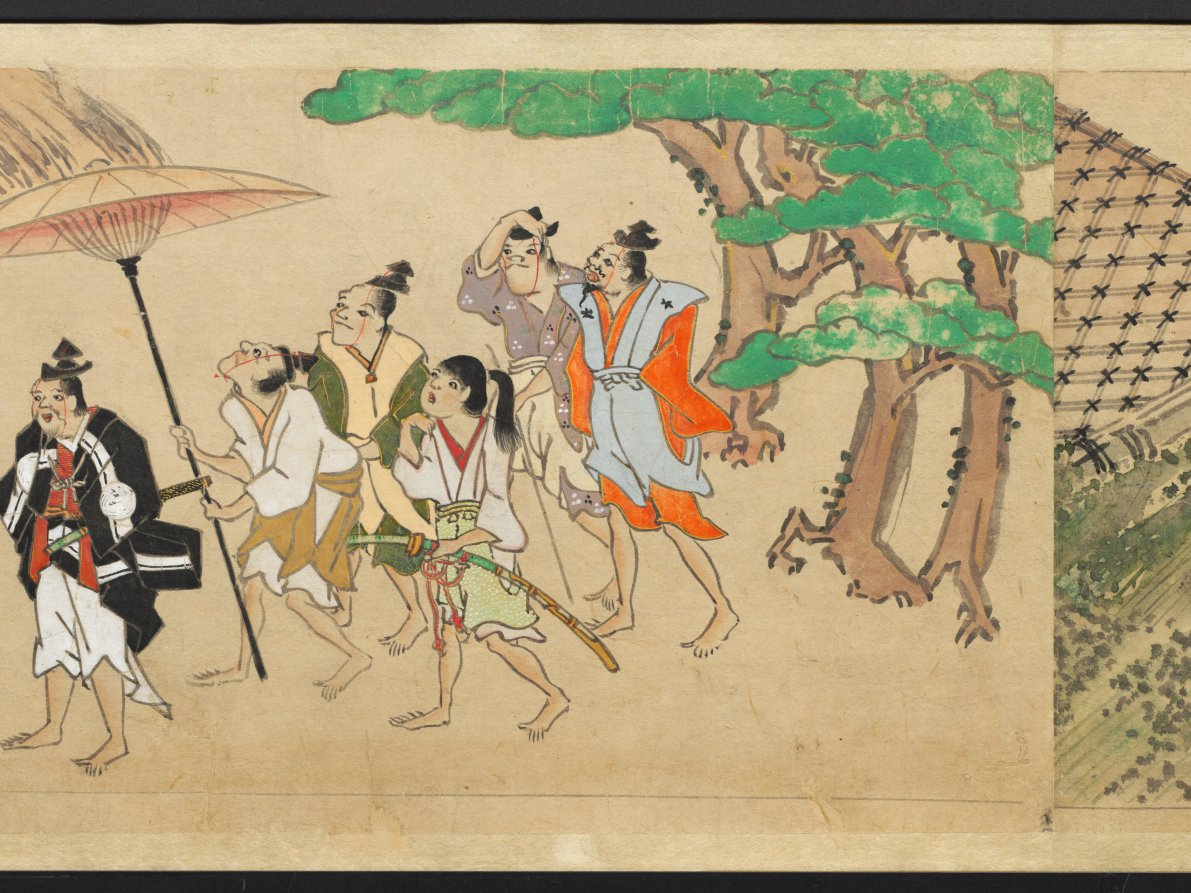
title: The Saltmaker's Story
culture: Japan, Edo period (1615–1868)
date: early 1600s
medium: One of a pair of handscrolls; ink, color, and gold on paper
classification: Painting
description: Once read and copied by girls at New Year’s celebrations and included in dowries, The Saltmaker’s Story is a rags-to-riches tale in which daughters are gifts from the gods. Despite his simple outlook, the main character progresses from humble roots as an associate at Kashima Shrine to the elite status of grandfather of the emperor through the intervention of the Kashima deity. The Saltmaker’s Story is traditionally presented in a set of three scrolls, but the text of this set has been removed by a previous owner, who remounted the illustrations as a pair. The paintings of this one take us from right to left through the first half of the tale.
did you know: This handscroll originally had texts before its paintings, but the texts were removed.